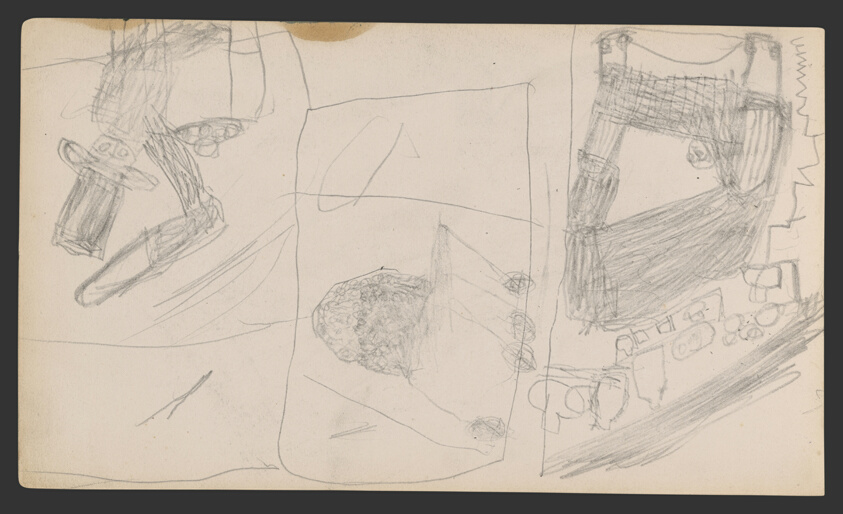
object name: Drawing and Watercolor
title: Sketchbook No. 2 (L'Estaque)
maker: Paul Cézanne; French, 1839-1906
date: 1875–86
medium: Graphite and pen and ink drawings on paper, bound into a book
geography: France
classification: sketchbook; graphite; prints and drawing; paper